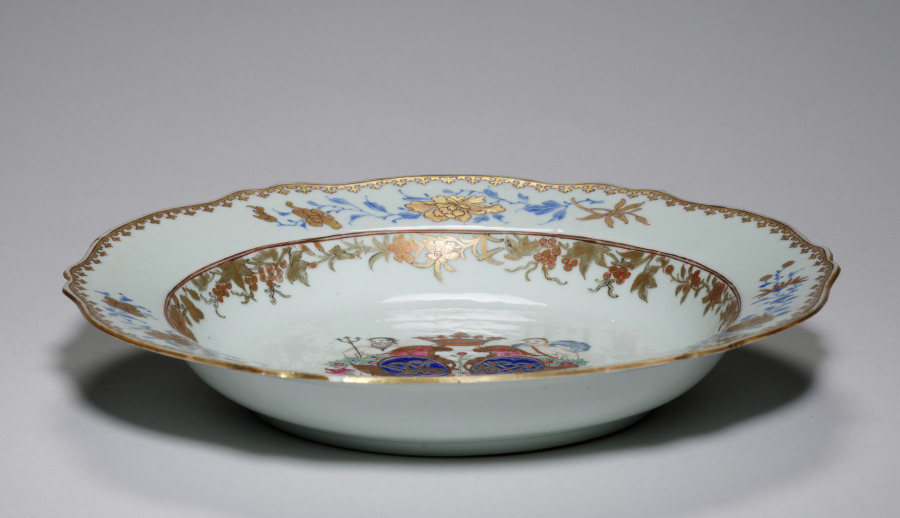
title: Soup Plate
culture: China, Chinese Export, 18th century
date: 1760–70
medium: porcelain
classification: Ceramic